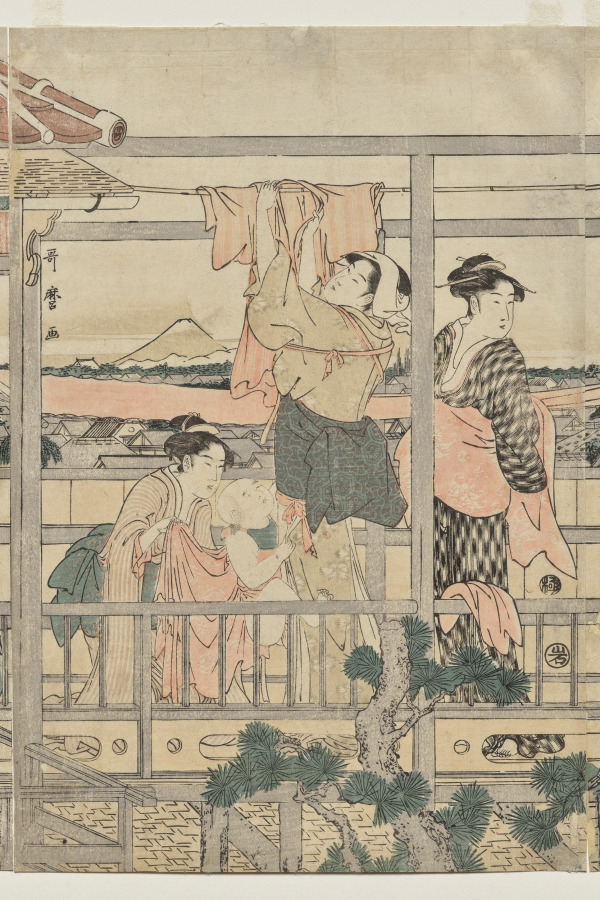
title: Women Hanging Laundry to Dry on a Balcony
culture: Japan, Edo period (1615–1868)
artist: Kitagawa Utamaro (Japanese, c. 1754–1806)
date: early 1790s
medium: color woodblock print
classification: Print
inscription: Artist's signature: Utamaro ga.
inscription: Publisher: Iwatoya Kisaburō (Iwa). Censorship Seal: Kiwame.